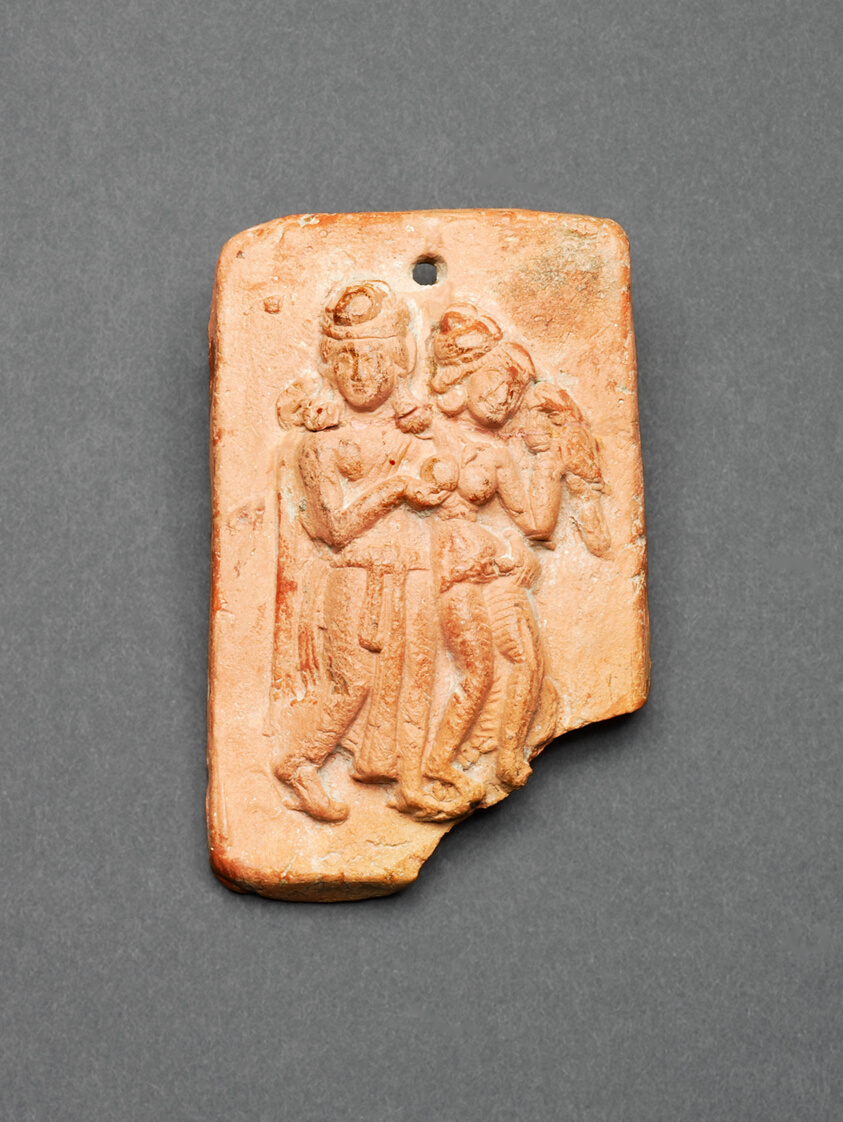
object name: Sculpture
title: Amorous Couple (Mithuna) with Parrot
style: South Asian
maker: India; West Bengal, Chandraketugarh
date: 1st century B.C.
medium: Molded terracotta with red slip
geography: West Bengal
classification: earthenware; ceramics; sculpture; asian art